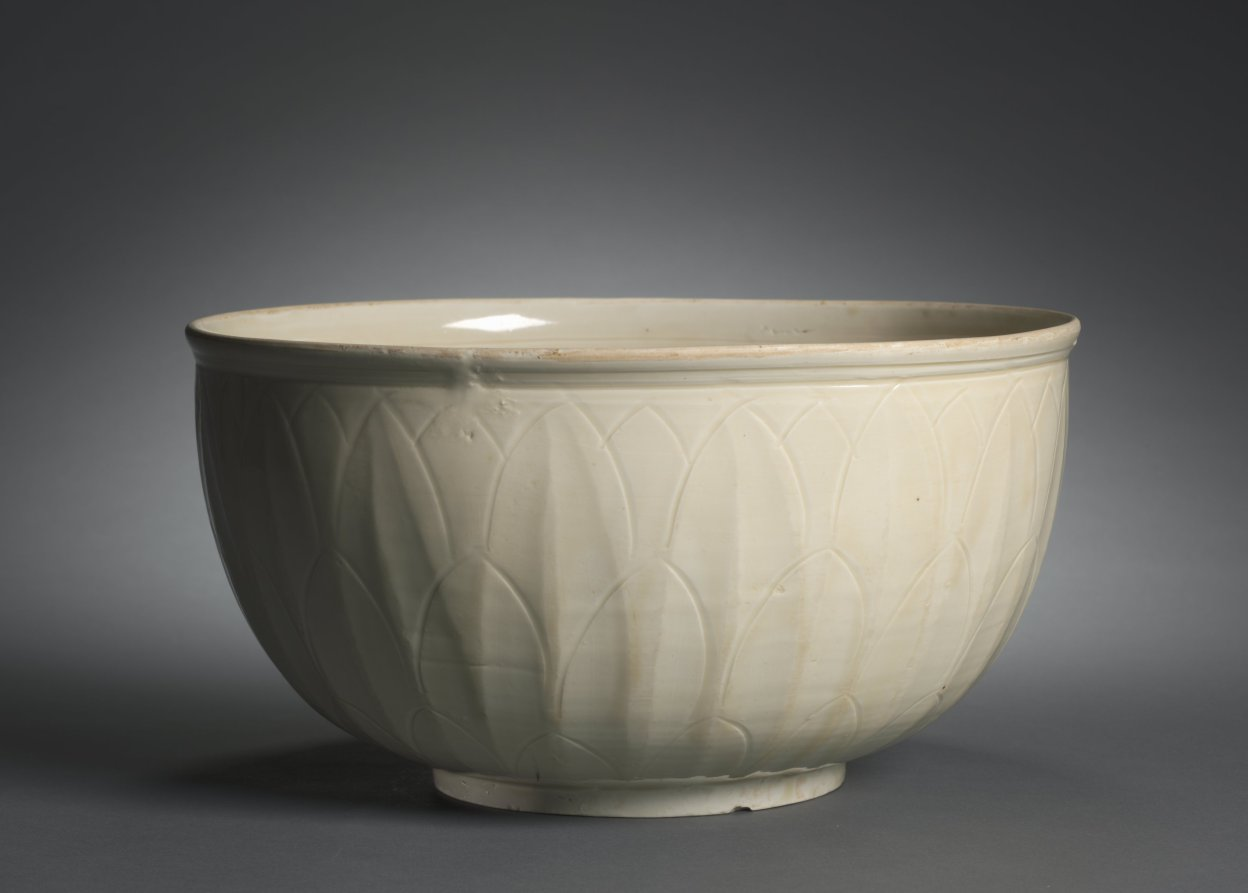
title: Basin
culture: China, Hebei province, Quyang, Jin dynasty (1115-1234)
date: 1100s–1200s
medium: cream-glazed porcelain with incised decoration, Ding ware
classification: Ceramic